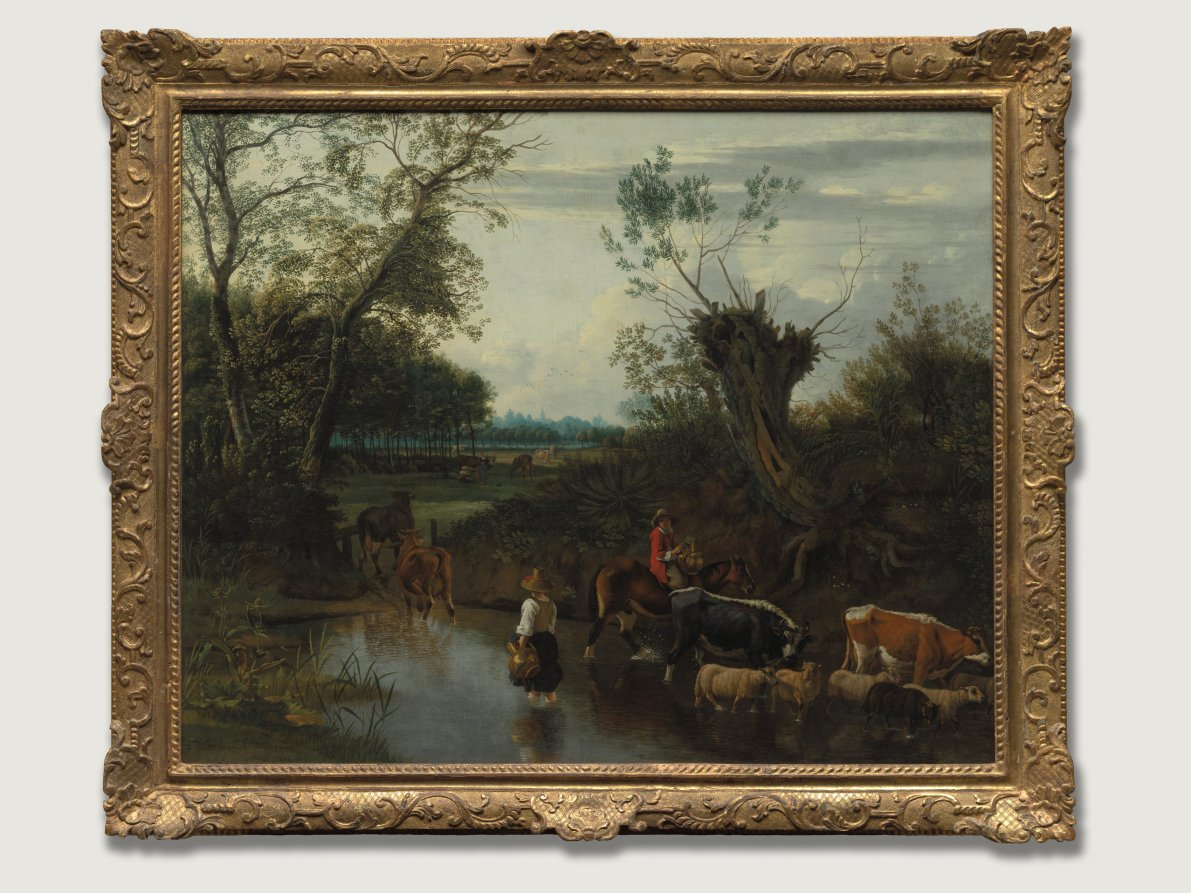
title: Peasants Crossing a Stream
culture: Flanders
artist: Jan Siberechts (Flemish, 1627-c. 1703)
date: c. 1670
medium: oil on canvas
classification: Painting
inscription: Signed lower left: "J. sibrechts. A. anvers."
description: The painting is characteristic of Jan Siberechts's Antwerp style, characterized by scenes with fords through which peasants wade with their cattle. The peasants wear simple but brightly colored attire and stand out against the cool green landscape. Flanked by overgrown foliage, the silver hues of the still stream shimmer with reflections. Over the course of his career, which included moving to London in 1672, Siberechts continued to use many of the same figures in his paintings, including Flemish peasant women carrying jugs, like the one seen in this painting. Likewise, his approaches to depicting animals, such as the cows seen here, changed very little over time and are ubiquitous throughout his oeuvre.